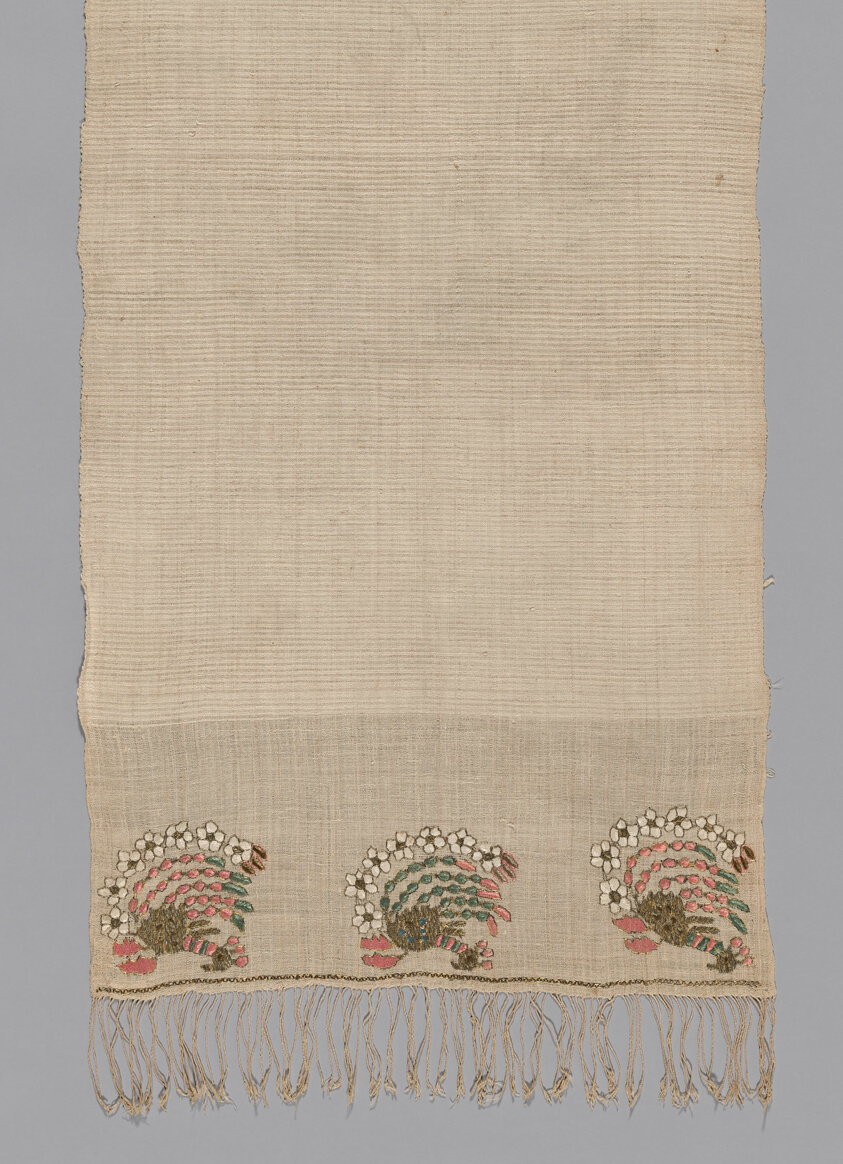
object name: Textile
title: Towel or Sash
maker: Turkey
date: 19th century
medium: embroidered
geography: Turkey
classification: textile; weaving; needlework (visual works)